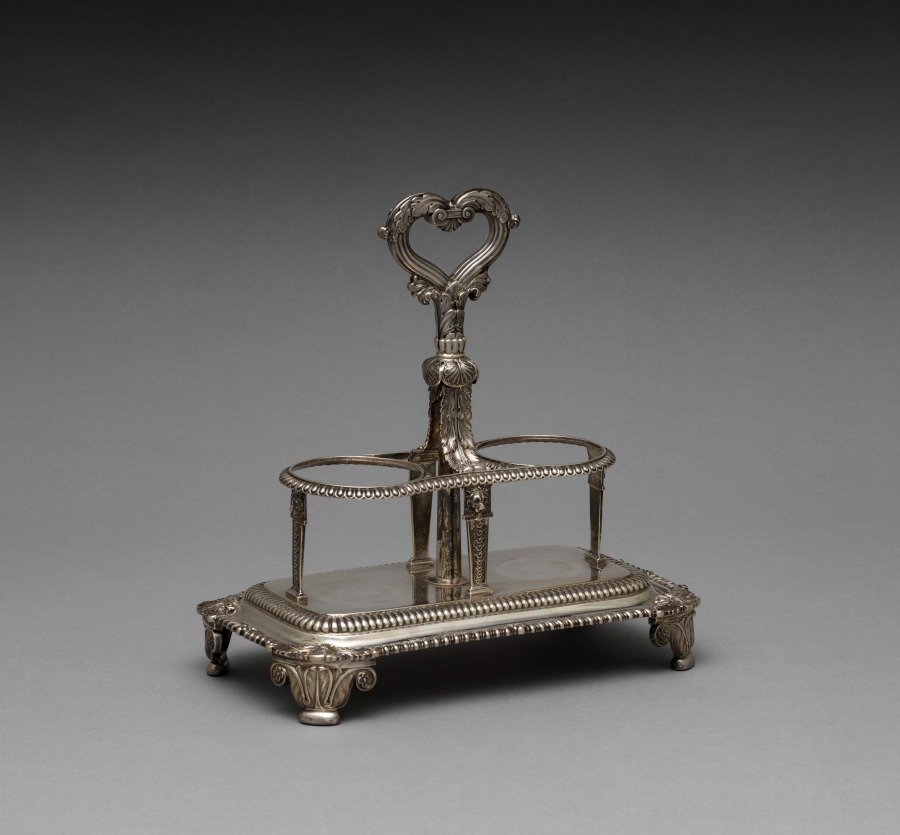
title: Cruet Stand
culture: England, London, 19th century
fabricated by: Paul Storr (British, 1771–1844)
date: 1817–1818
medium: silver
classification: Silver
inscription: Scratched underside: "56\ Eoxx\ moxx", "6087", "SRH-".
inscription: "2" engraved on base leg of vessel holder and by pin on underside of base.